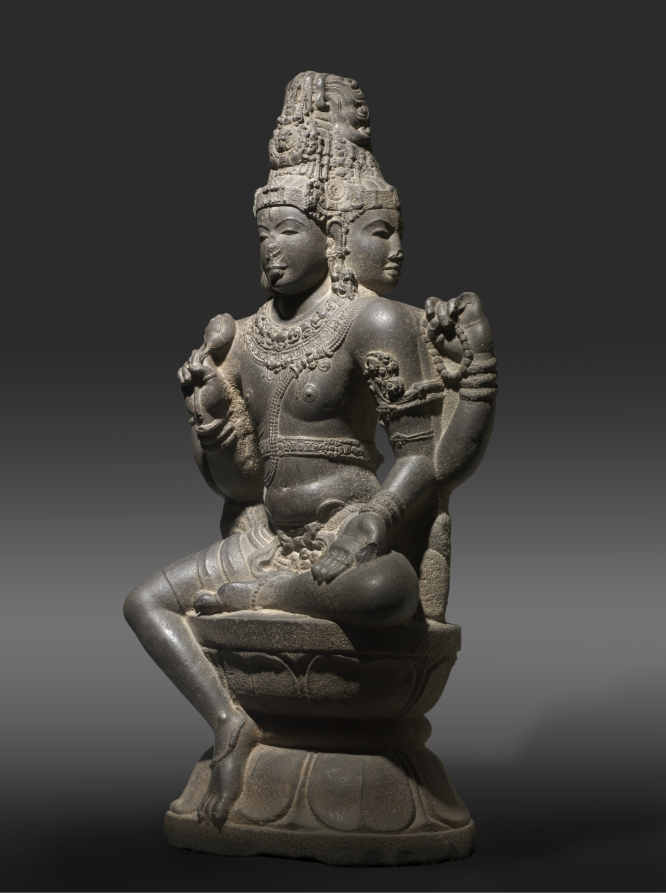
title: Brahma-Shiva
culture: South India, Tamil Nadu, Chola dynasty, late 10th - early 11th century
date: late 900s–1000s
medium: granite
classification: Sculpture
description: In the Hindu pantheon Brahma is in charge of carrying out the work of creation. In this tour-de-force of South Indian temple sculpture, he is in a special regal aspect, with the only elements of his typical priestly appearance being the prayer beads and the matted dreadlocks piled on his head. Four arms connote superhuman power, and four heads convey the idea that his creative activities spread in all four directions. His upper right hand enjoins freedom from fear, and the lower holds a lotus bud associated with birth and the process of creation. His lowered left hand is held in the gift-giving gesture, suggestive of the gift of creation he will bestow upon the world.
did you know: The back of the sculpture retains the original textured surface from a pointed chisel, suggesting it was in a niche or near a wall, protected from worshippers’ touches.